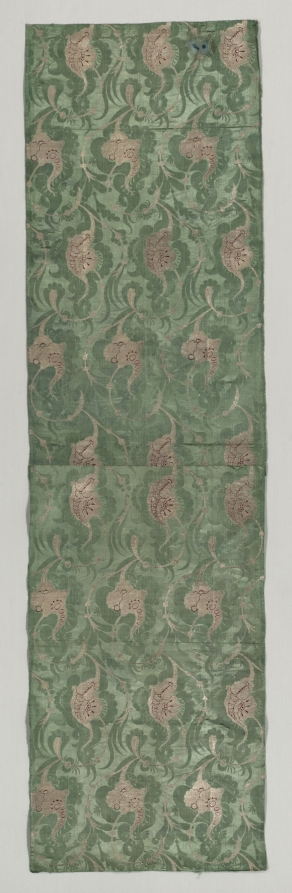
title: Length of Brocade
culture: Italy, Venice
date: 1700s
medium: brocade; silk and metal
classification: Textile